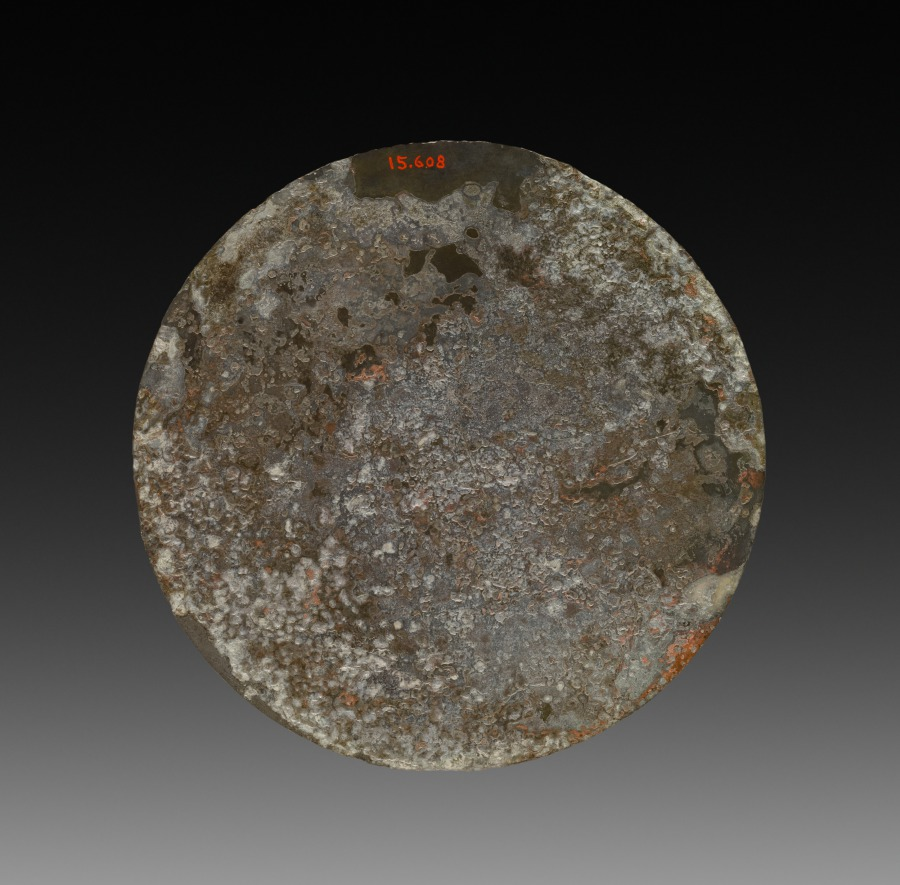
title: Mirror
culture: China, Six Dynasties period (220–589 CE)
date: 317–581 CE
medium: bronze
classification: Metalwork